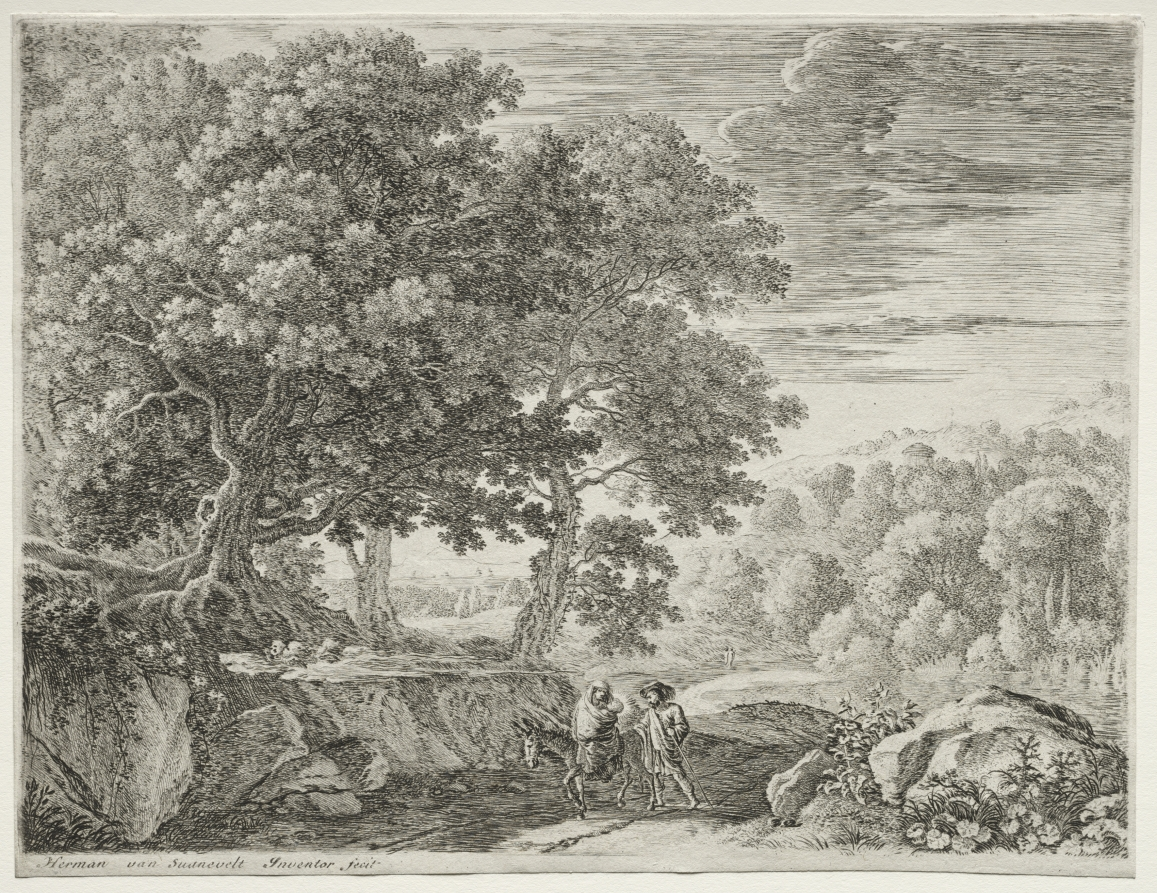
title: The Flight into Egypt: The Holy Family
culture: Netherlands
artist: Herman van Swanevelt (Dutch, c. 1600–1655)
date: ca. 1652–54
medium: etching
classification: Print